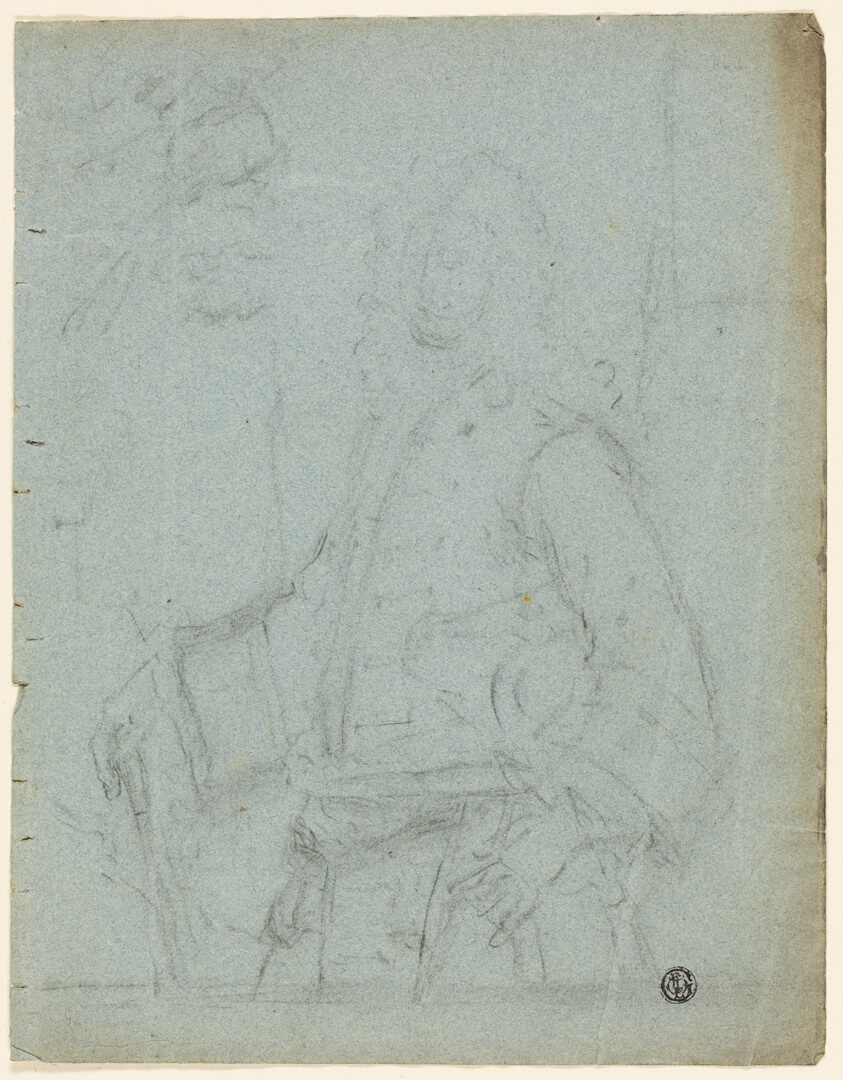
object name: Drawing and Watercolor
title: Portrait of a Man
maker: Possibly William Hoare (English, c. 1707-1792); or Godfrey Kneller (English, born Germany, 1646-1723); or Charles Jervas (Irish, c. 1675-1739)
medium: Black chalk, with touches of white chalk, on blue laid paper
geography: England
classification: chalk; drawings (visual works); prints and drawing